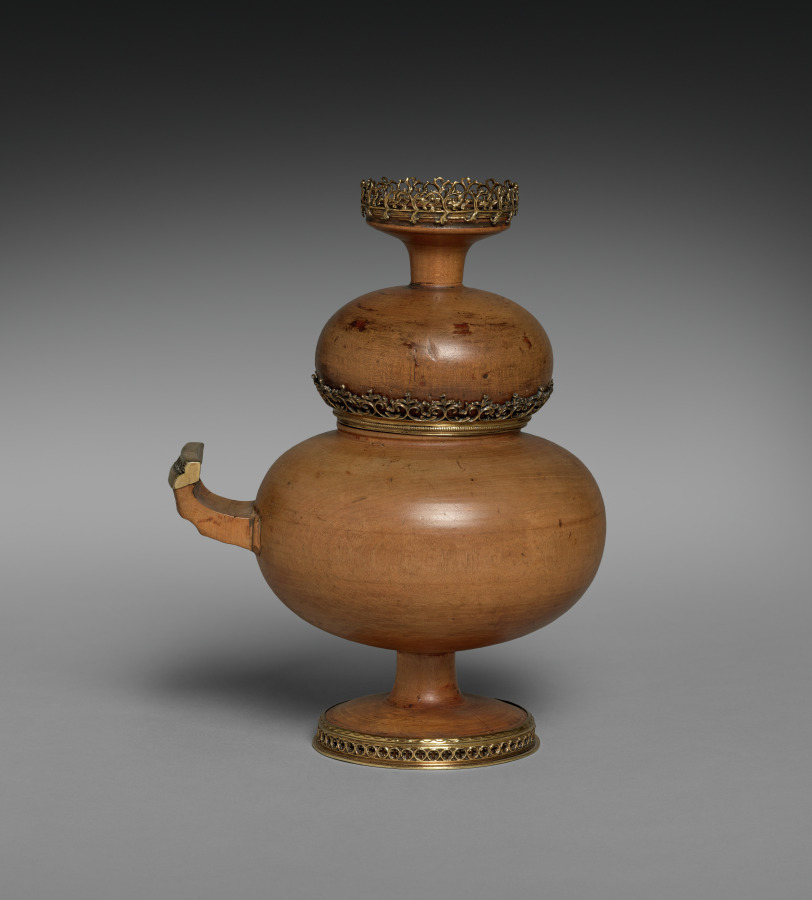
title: Double Cup (Mazer)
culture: Germany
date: c. 1530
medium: maple wood with gilt-silver mounts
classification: Wood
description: A characteristic form of drinking vessel made of close-grained wood, especially maple, was developed in Germany as early as the thirteenth century. It consisted of a larger cup with a foot and a handle and a smaller cup on top. The upper one served as a lid but could also be removed and used as a separate drinking vessel. In this example the smaller upper cup is inset with a memorial portrait medallion of Albrecht Dürer made in the year of his death, 1528. The medal is the work of Matthes Gebel who was active in Nuremberg and Augsburg as a medallist from 1523 to his death in 1574. The reverse of the medal is set into the base of the larger lower cup.